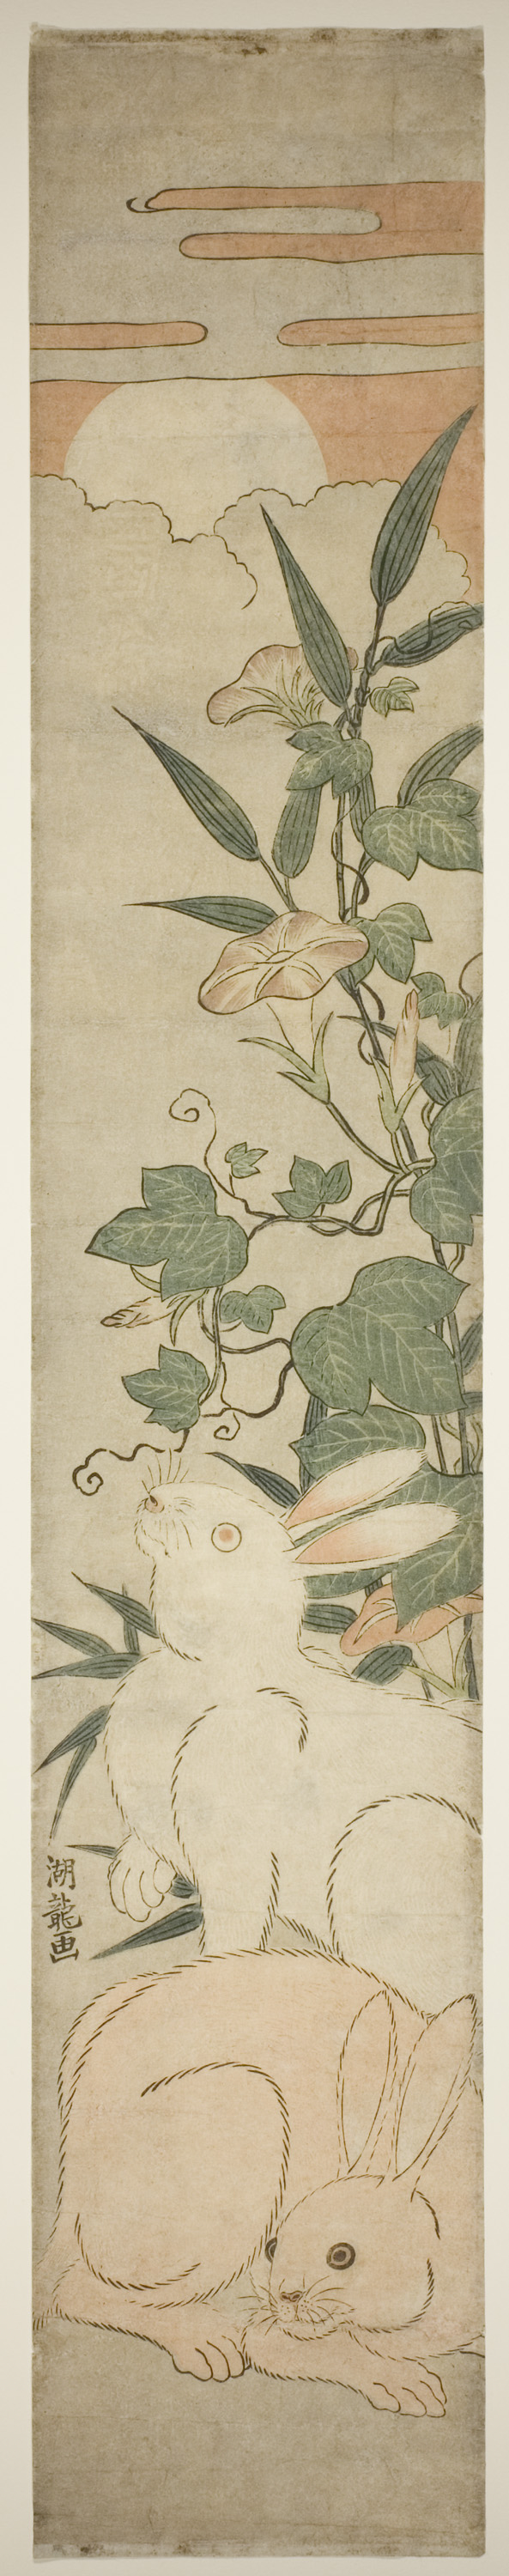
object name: Print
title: Morning-Glories, Rabbits, and Moon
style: Japanese (culture or style)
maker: Isoda Koryusai (Japanese, 1735-1790)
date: c. 1780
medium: Color woodblock print, hashira-e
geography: Japan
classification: woodblock print; print; asian art